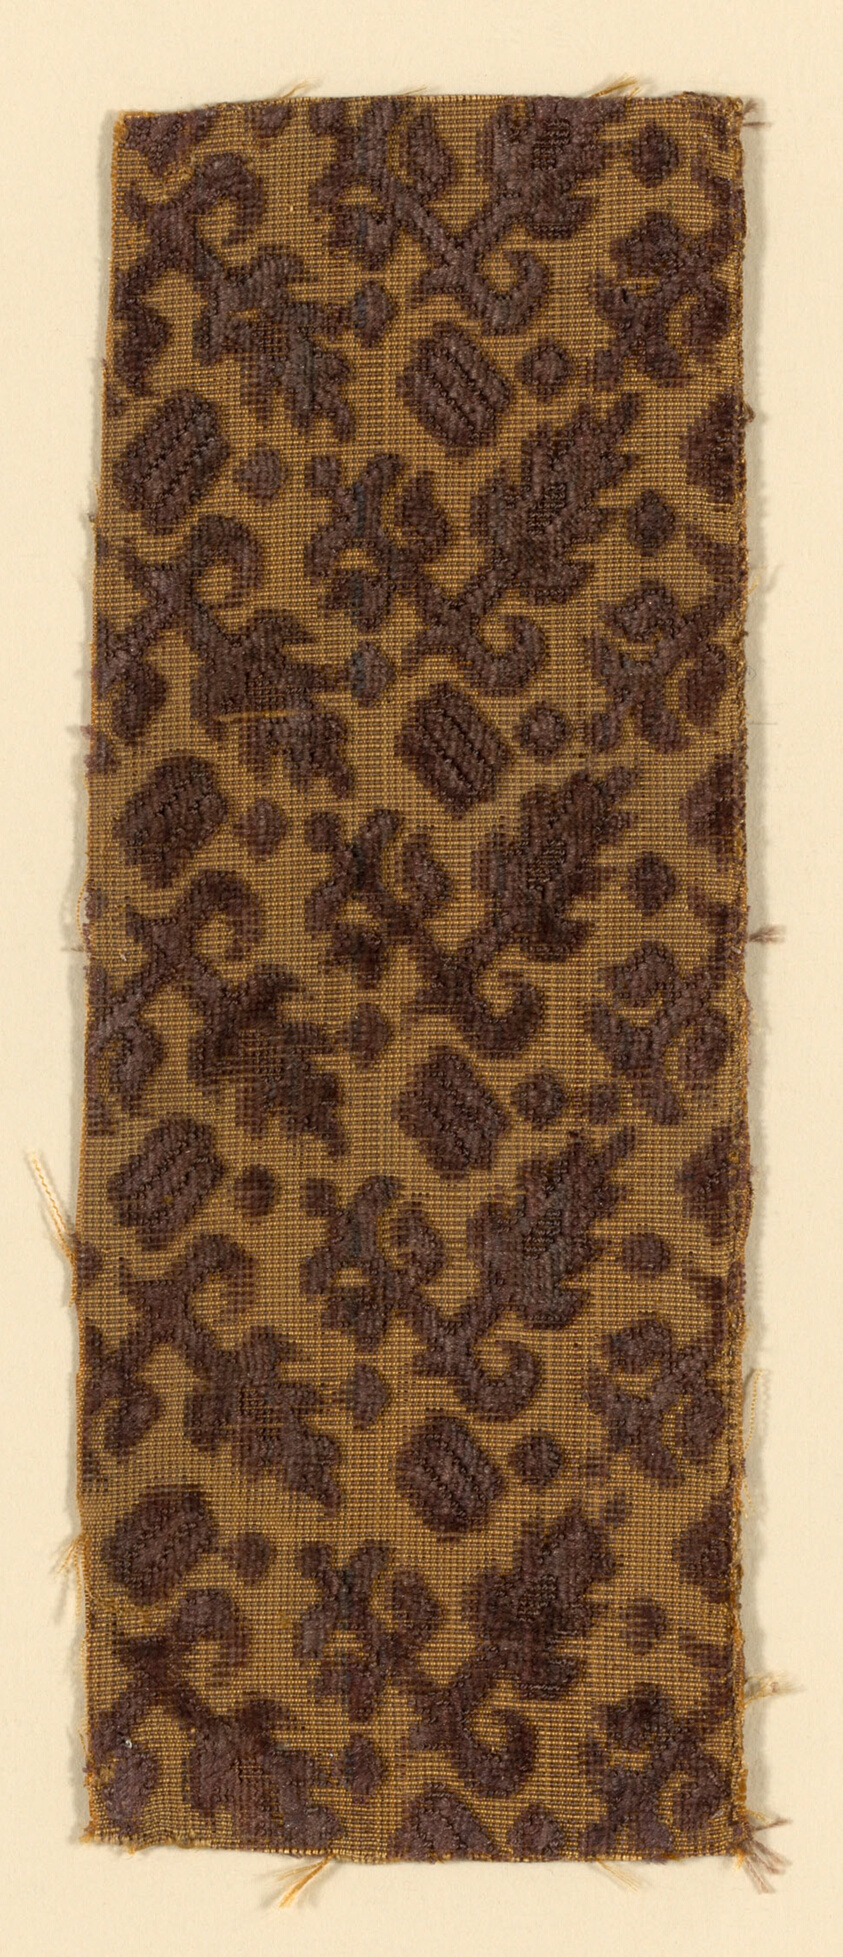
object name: Textile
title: Fragment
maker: Italy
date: 1600/50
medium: Silk, cut, uncut, voided velvet against satin weave foundation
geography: Italy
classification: textile; weaving - velvet